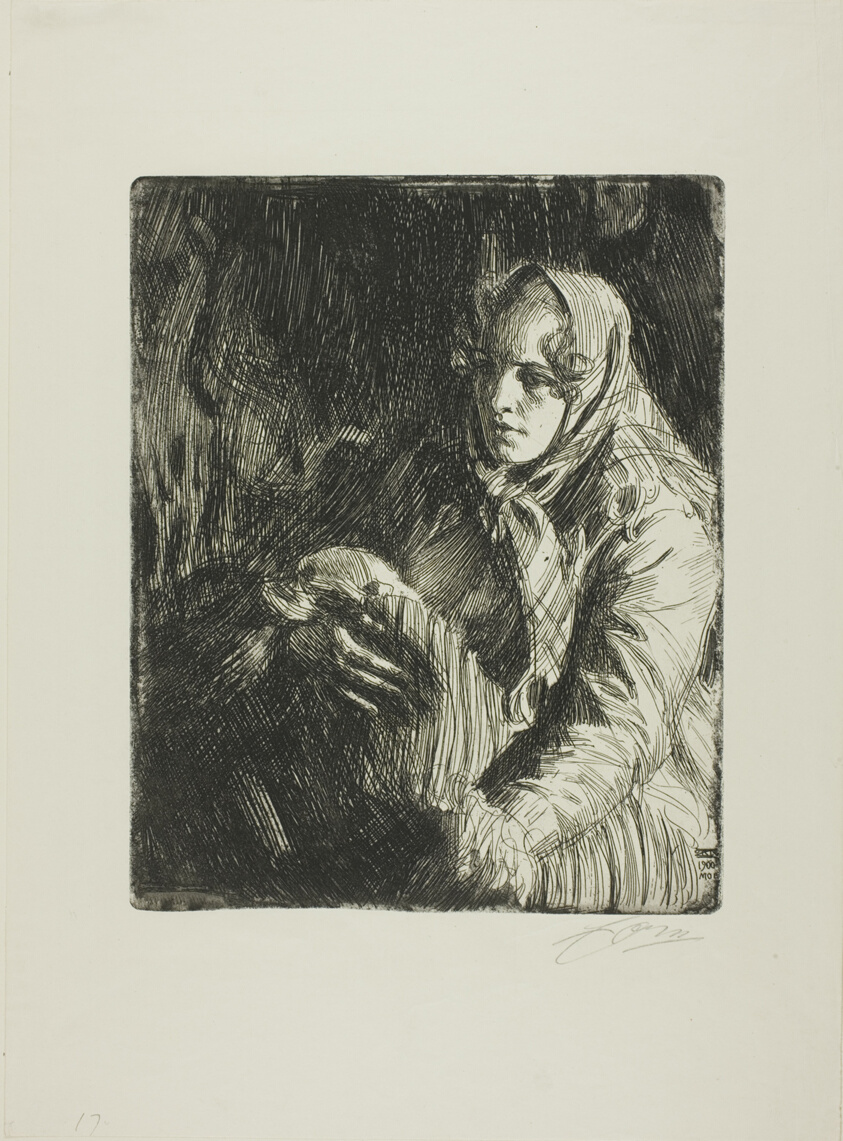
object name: Print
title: Madonna (A Mother)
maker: Anders Zorn (Swedish, 1860-1920)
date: 1900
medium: Etching on ivory wove paper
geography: Sweden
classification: etching; print; prints and drawing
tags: mothers, children, babies